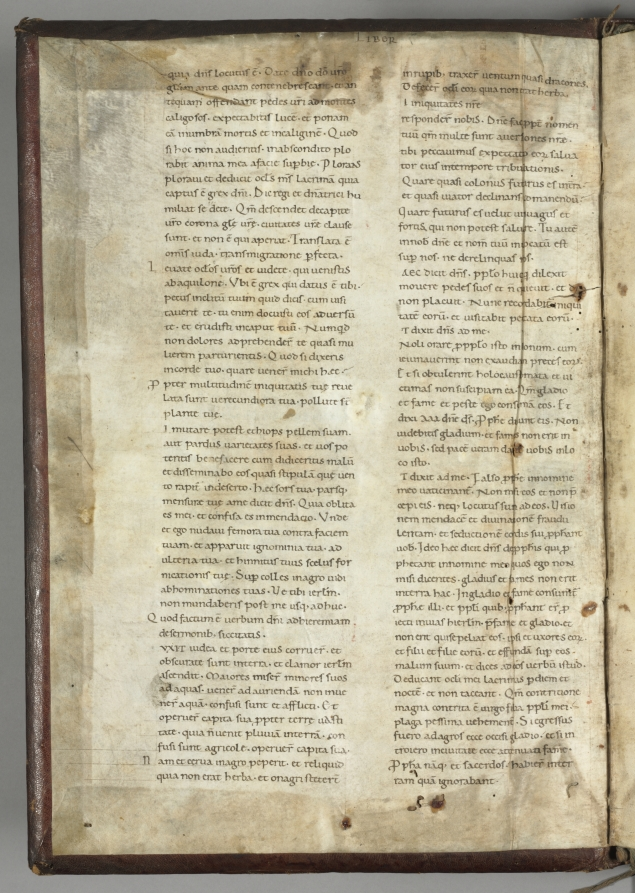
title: Choir Book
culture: Italy, 16th century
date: 1500s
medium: leather binding, copper alloy buckles, lead seal, parchment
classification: Manuscript